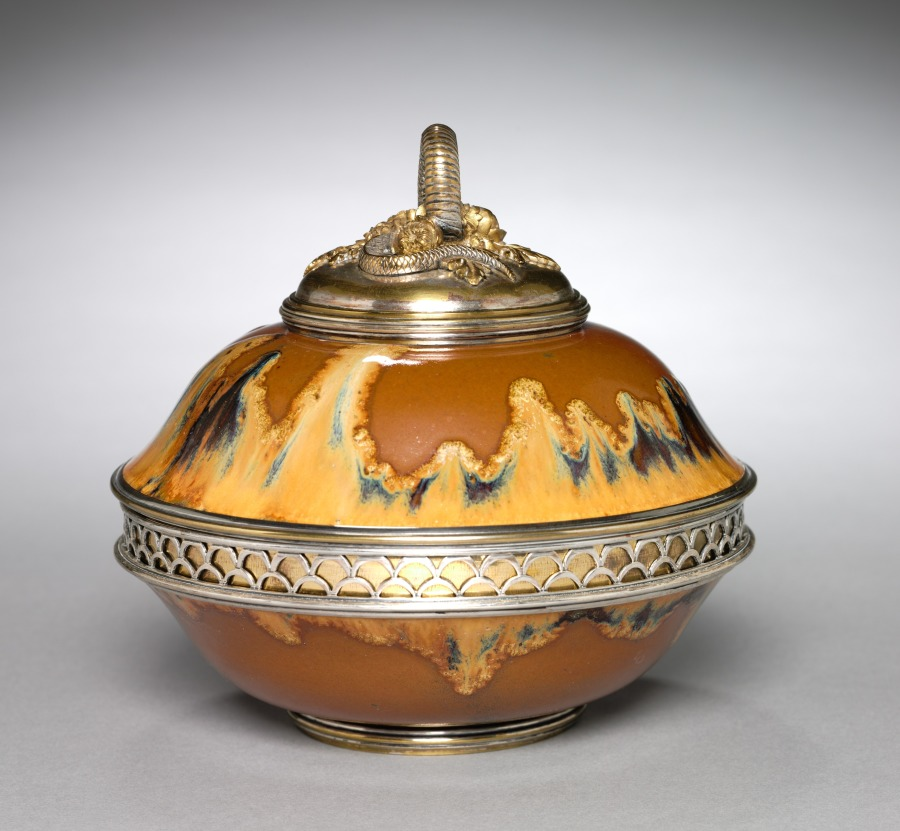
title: Covered Bowl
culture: France, late 19th-early 20th Century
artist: Auguste Delaherche (French, 1857–1940)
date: c. 1899–1900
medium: stoneware with metal mounts, silvered and gilded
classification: Ceramic